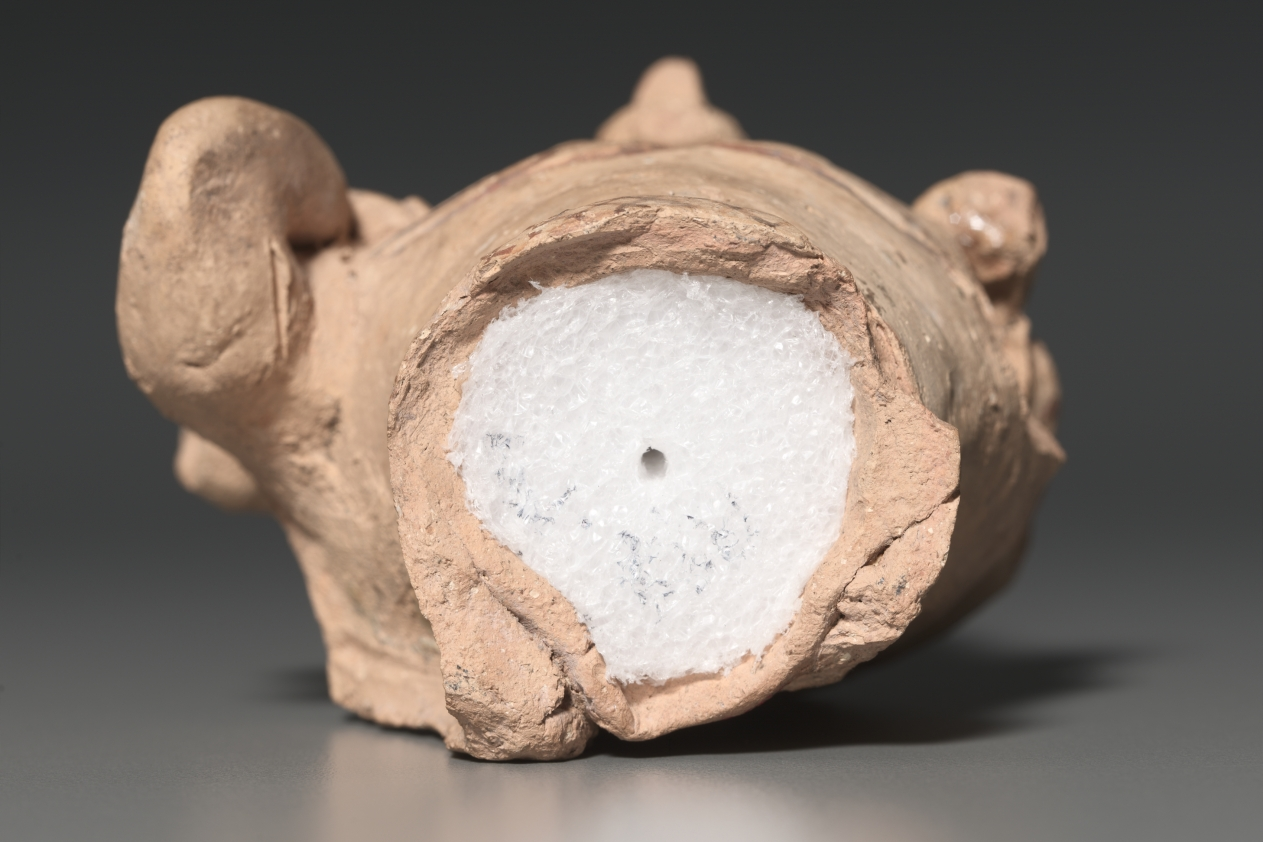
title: Kriophoros (Ram-Bearer), Statuette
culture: Greece, Crete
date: 650–600 BCE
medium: terracotta and polychrome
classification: Sculpture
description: In Greek art, the kriophoros is usually a shepherd or, later, Hermes. This statuette may be unique in presenting a warrior-hero as kriophoros. It is certainly one of the earliest sculptural representations of this type. The figure appears to be wearing a helmet, secured under the chin with a painted strap. Double outlines, reinforced at the bottom with incision and adorned with dotted circles in the area of the nipples, were used to suggest breastplates. A thick waist belt, decorated with painted crosshatched lines, is clearly the heroic zoster (warrior's belt). As described in ancient Homeric poetry, the zoster is the ultimate symbol of valor and prowess, worn by such heroes as the brothers Agamemnon and Menelaos and old King Nestor. This figure is shown in the solemn act of presenting a ram, most likely as a sacrificial offering, to a god or goddess.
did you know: This heroic figure is shown presenting a ram, most likely as a sacrificial offering to a god or goddess.